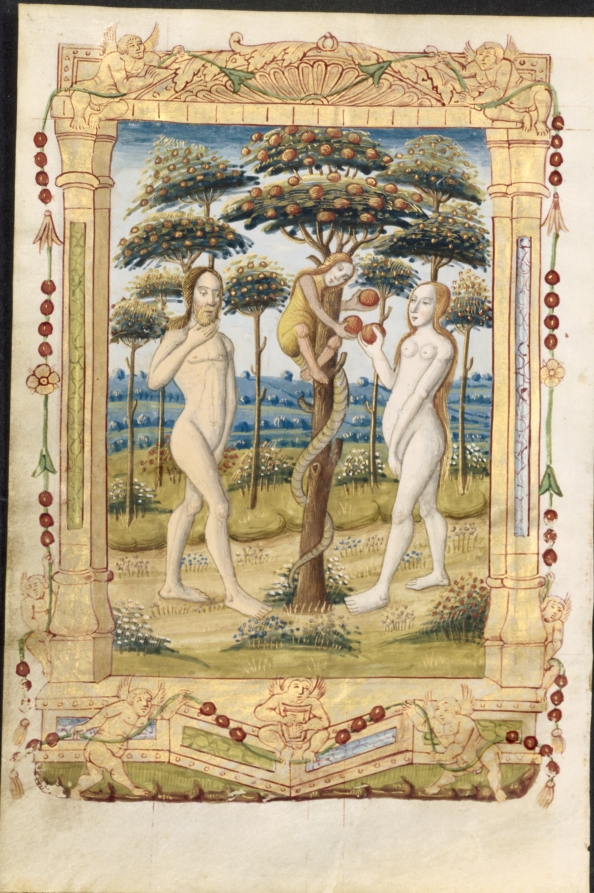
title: Leaf from a Book of Hours: Adam and Eve and the Fall of Man (Prefatory Miniature to the Office of the Virgin) (recto)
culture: France, Rouen, 16th century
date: c. 1510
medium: ink, tempera and liquid gold on vellum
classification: Manuscript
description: Characteristic of the artist's hand, the bright orange-reds combine with deep blues, greens, and an abundance of gold wash in this leaf. He used fine parallel lines or crosshatching in gold to indicate the shading, highlights, and texture of draperies, suggesting some knowledge of printmaking, an art for which Rouen was also an important center. His figures have large, thickly outlined oval faces. This miniature also demonstrates the emerging fashion in both Rouen and Paris for highly involved, Italianate architectural frames: winged putti, swags, urns, garlands, scallop shells, pillasters, and masks. These elements could be assembled in different ways so that no two frames were identical. Rouen in the late 1400s and early 1500s was an established and important center for book production. Richly decorated library texts and books of hours, such as the present leaves, were made in Rouen for sale in the cours des libraires, next to the cathedral.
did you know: This leaf came from a highly customized and lavish book of hours made in Rouen, a major center of book production at the time.